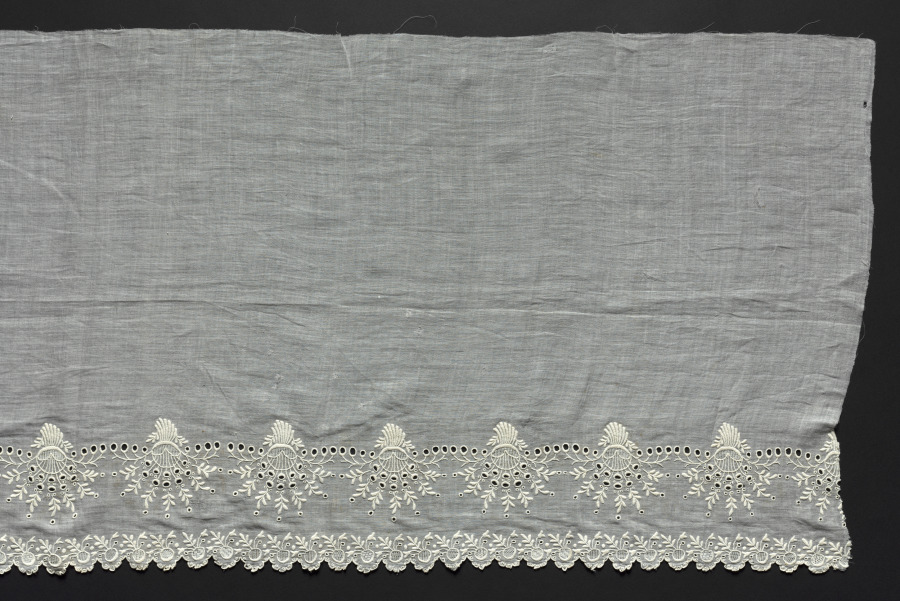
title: Portion of a Flounce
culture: Italy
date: 1800s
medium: Plain weave cotton: needle lace (drawnwork) and embroidery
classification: Embroidery